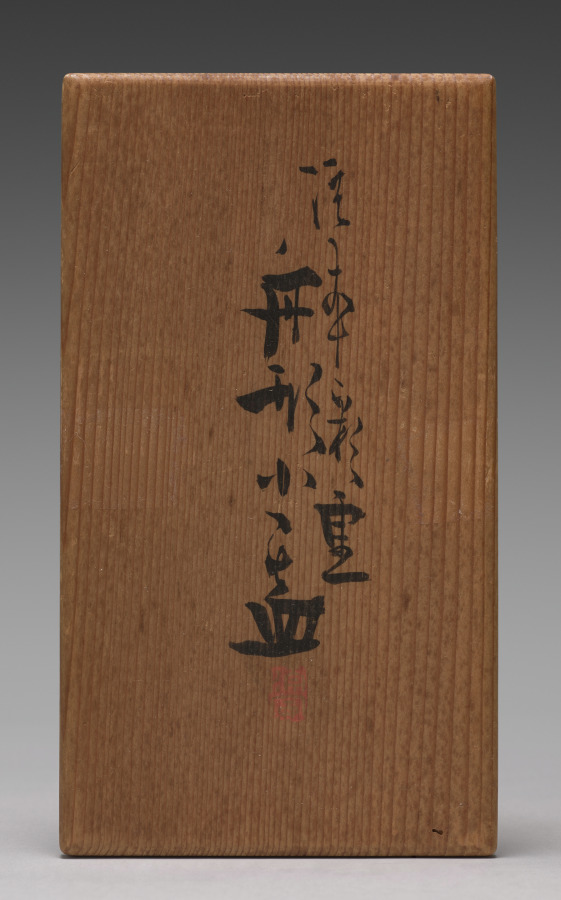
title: Boat-Shaped Bowl with Plovers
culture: Japan, Meiji period (1868–1912)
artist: Seifū Yohei III (Japanese, 1851–1914)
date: 1893–97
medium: Stoneware with crackled glaze and overglaze color enamel and gold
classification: Ceramic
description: Overglaze color enamels create a seascape made complete by the bowl’s boat shape. The bowl’s form inserts a human presence into the scene, much in the way rusu mōyō is used in paintings to suggest people just out of view. Rusu mōyō is a pictorial device by which the presence of someone physically absent from an image is conveyed through the depiction of clothing or other items. The inside of the bowl has a scene of plovers flying through the sky over a profusion of seaweed in sand below. In addition to the black, gray, and green of the overglaze elements, warm pink banding and mottling in the clay come through the glaze and are remarkably effective at suggesting the seashore.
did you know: On the outside of the bowl, on each side, birds fly about grasses in search of a meal.